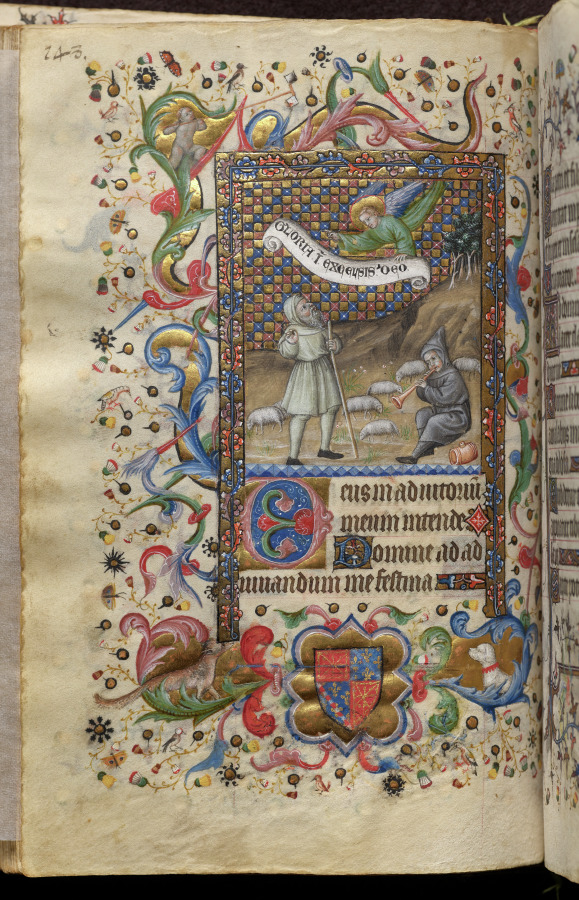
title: Hours of Charles the Noble, King of Navarre (1361-1425): Annunciation to the Shepherds (Tierce), fol. 74 (verso)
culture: France, Paris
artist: Master of the Brussels Initials and Associates (French)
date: c. 1405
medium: ink, tempera, and gold on vellum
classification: Bound Volume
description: This precious volume was obviously highly prized by its owner, the French-born King of Navarre, who had his coat of arms painted on no less than twenty folios. Rather than directly commissioning this manuscript from a specific workshop, it seems that Charles the Noble acquired his book of hours -- perhaps ready-made for the luxury market -- while on a trip to Paris in 1404-05. A collaborative effort, six painting styles are evidenced within the pages of this codex, those of two Italians, two Frenchmen, and two Netherlanders. The painter who was responsible for the planning and decoration of the book, and who produced seventeen of the large miniatures, was a Bolognese artist known as the Master of the Brussels Initials. His principal assistant, responsible for most of the borders, was a Florentine who signed his name "Zecho" da Firenze on folio 208 verso.